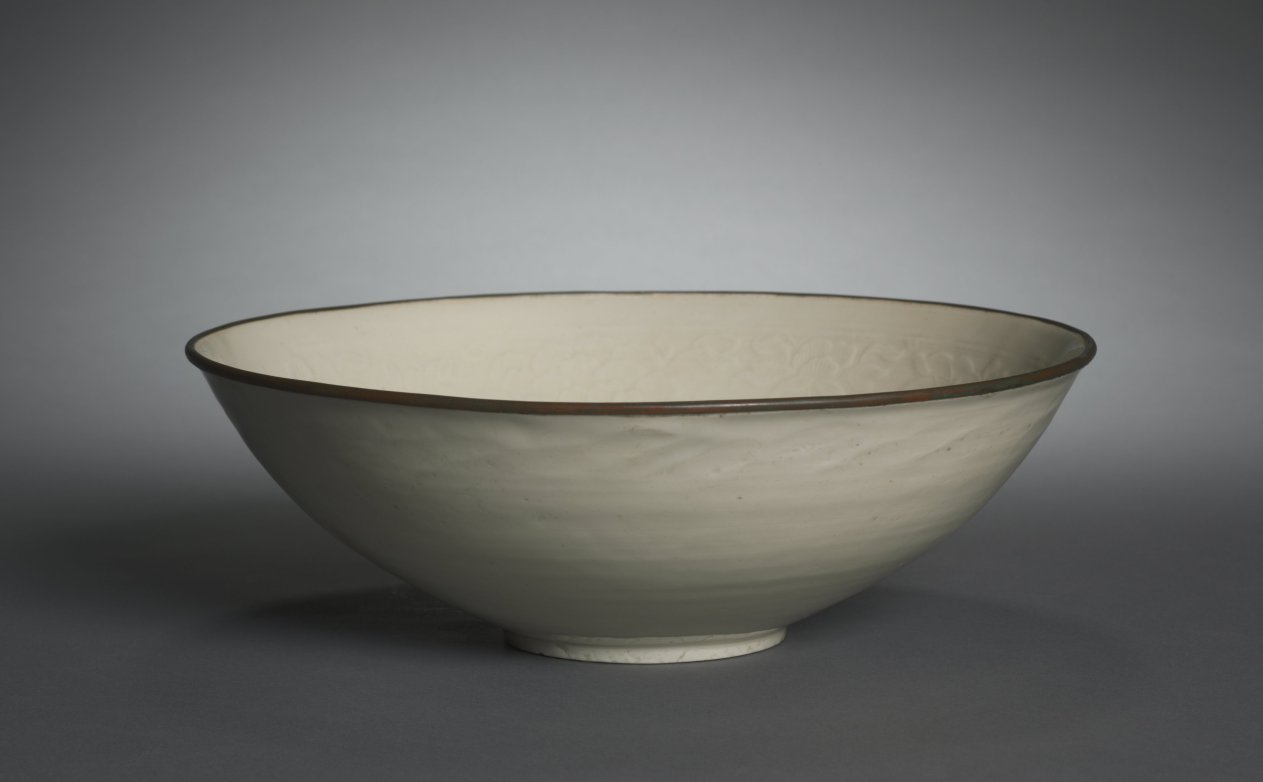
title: Large Bowl with Peony Scrolls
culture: China, Hebei province, Quyang, Jin dynasty (1115-1234)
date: 1100s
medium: cream-glazed porcelain with molded design and copper-bound mouth rim, Ding ware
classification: Ceramic